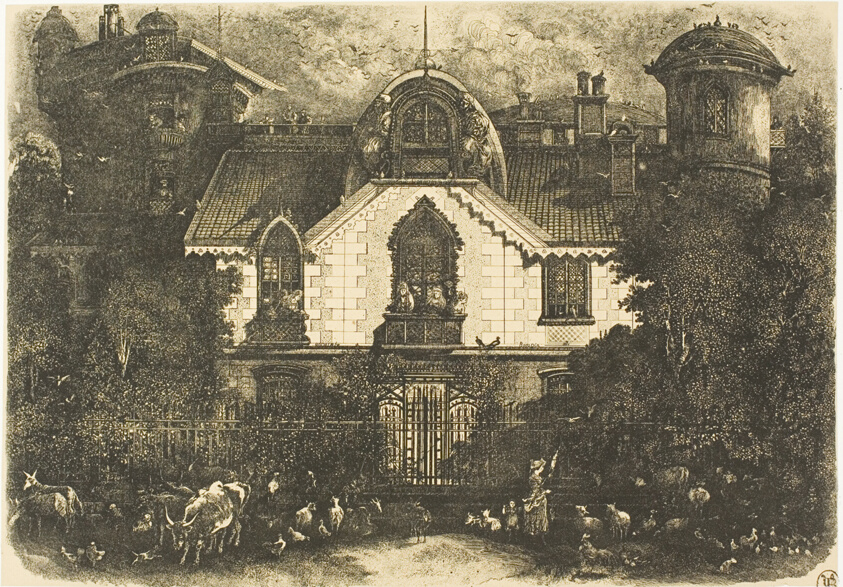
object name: Print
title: The Enchanted House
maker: Rodolphe Bresdin (French, 1825-1885)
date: 1871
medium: Lithograph (etching transfer) on cream China paper laid down on white wove paper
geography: France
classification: etching; print; prints and drawing